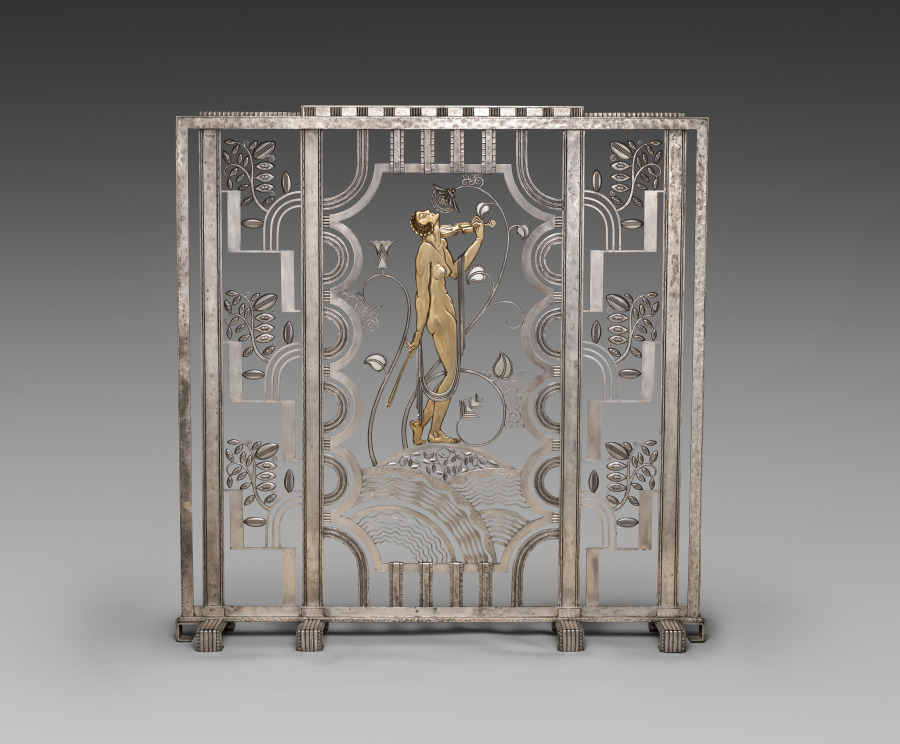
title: Muse with Violin Screen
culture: America, Ohio, Cleveland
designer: Paul Fehér (American, born Hungary, 1898–1990)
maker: Rose Iron Works (America, Ohio, Cleveland, est. 1904)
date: 1930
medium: Steel, brass; silver and gold plating, cotton velveteen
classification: Metalwork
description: Since the early years of the 20th century, the Rose Iron Works, a Cleveland supplier of architectural ornament, has produced distinguished metalwork. The company’s founder, Martin Rose, was born in Austria-Hungary and studied ornamental metalsmithing in Vienna prior to immigrating to Cleveland in 1902. In the 1920s, he hired a talented young Parisian designer, Paul Fehér, to work for the firm. Fehér’s designs, culminating in this massive screen, brought a modern European sensibility to the Rose Iron Works production. With its geometric patterning, highly stylized and abstracted natural forms, and the central figure reminiscent of the celebrated jazz singer Josephine Baker, this screen reflects the classic motifs of Art Deco design.